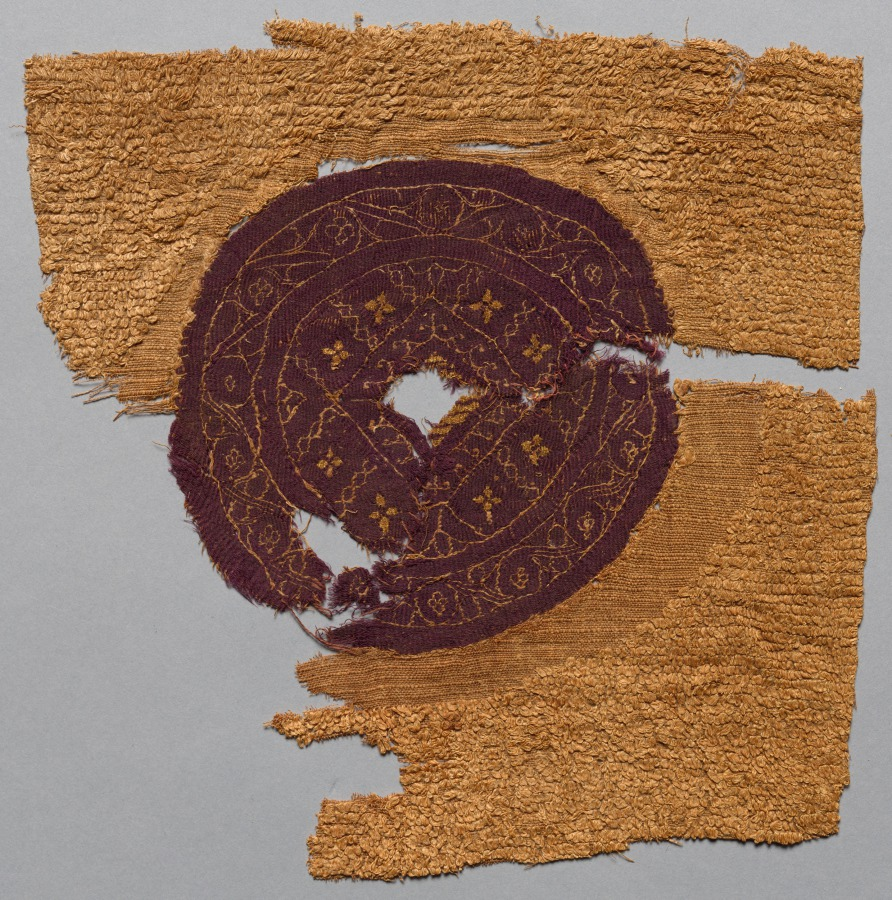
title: Fragment with Gold Foil, from a Furnishing Fabric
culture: Egypt, Byzantine period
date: 300s–400s CE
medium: undyed linen, dyed wool, and gold foil; plain weave with supplementary weft-loops, slit-tapestry weave with supplementary weft wrapping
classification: Textile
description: The rare gold foil and rich purple wool in these two fragments originally enriched a luxurious fabric. Costly gold foil wrapped around a silk core forms the central motif within a diamond, woven in tapestry weave. The surrounding interlacing knot design—achieved with three overlapping squares (in the small fragment) or interlacing squares (in the large fragment)—offered protection from danger and harm. The roundels were woven with extra, or supplementary, linen wefts wrapped on the purple ground. Linen pile loops in the ground fabric resisted abrasion in furnishing fabrics and provided insulation in tunics.